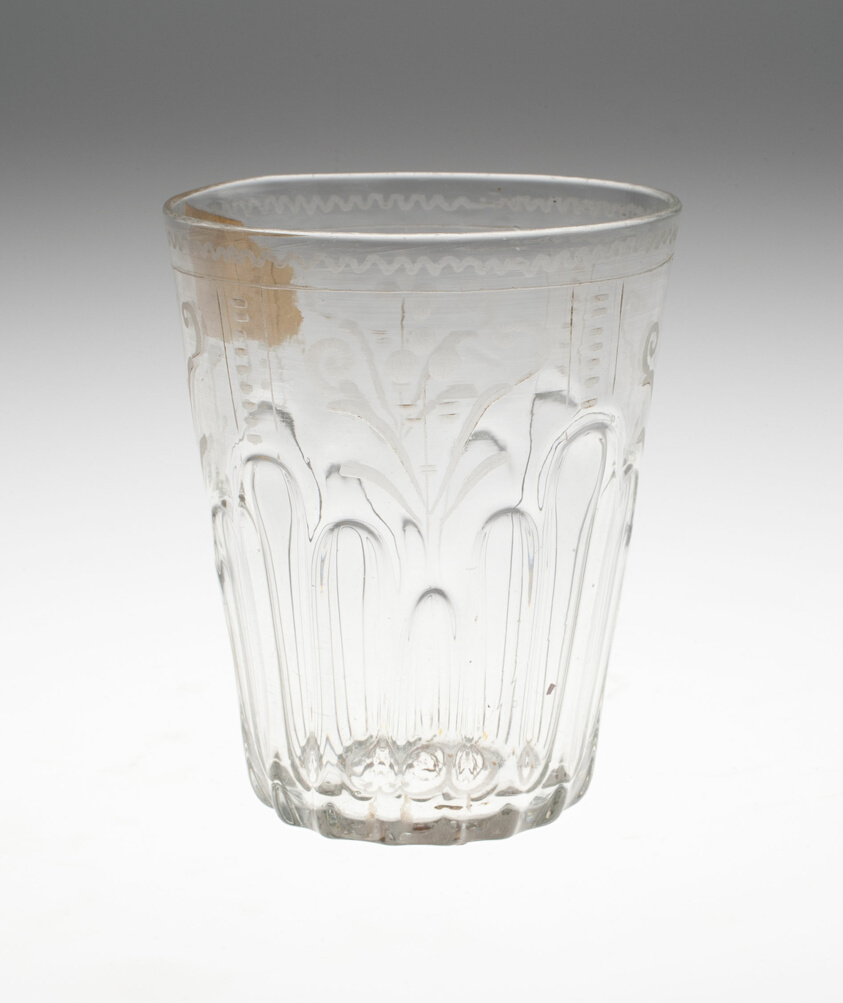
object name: Glass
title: Beaker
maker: Spain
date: Mid to late 18th century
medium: Glass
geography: Spain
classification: glass; european decorative arts